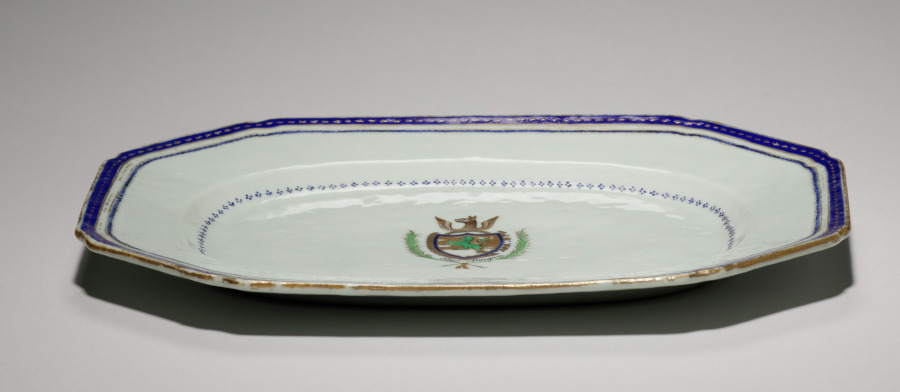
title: Small Platter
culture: China, Chinese Export -- American Market, early 19th century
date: c. 1800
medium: porcelain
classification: Ceramic